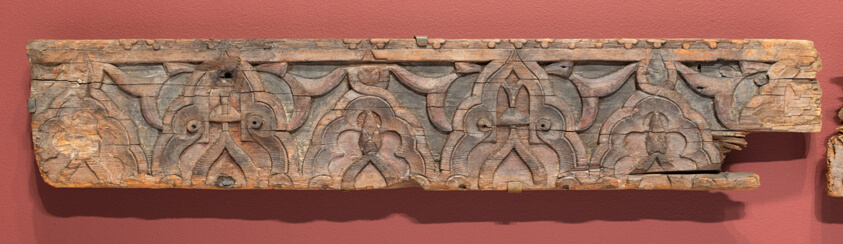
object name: Architectural fragment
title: Carved Wooden Panel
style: Islamic (culture or style)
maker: Morocco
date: Marinid dynasty (1244–1465), 14th century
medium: Carved wood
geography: Morocco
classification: wood; architectural fragment; asian art